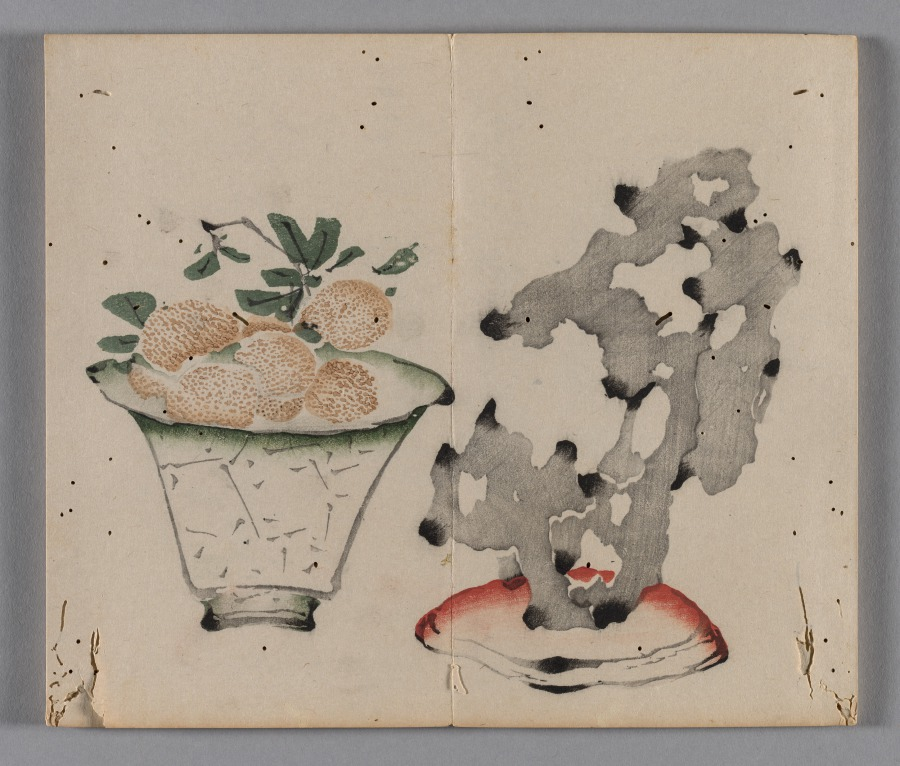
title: Ten Bamboo Studio Painting and Calligraphy Handbook (Shizhuzhai shuhua pu): Fruit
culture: China, Qing dynasty (1644-1911)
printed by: Hu Zhengyan (Chinese, c. 1584–1674)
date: 1633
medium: Woodblock-printed book; ink and colors on paper; first edition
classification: Print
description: Color printing reached a level of perfection in the early 1600s, as seen in this Ten Bamboo Studio Collection of Calligraphy and Painting and the Mustard Seed Garden Manual of Painting (printed 1679 and 1701). The painterly quality, precision in registering (aligning) the woodblocks, and harmonious colors made them the most successful color print editions in Chinese history. Both editions were printed and compiled in Nanjing, spread nationwide, and had a great impact on the arts in Japan and Korea.